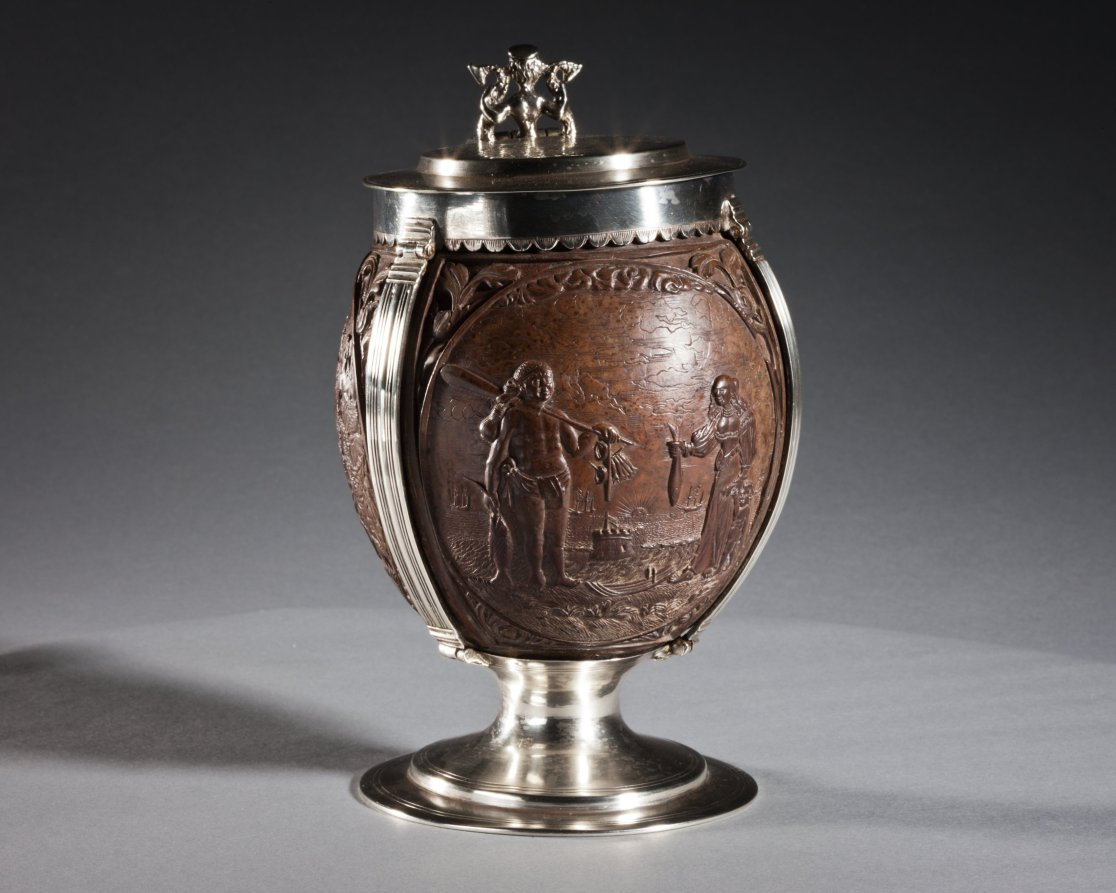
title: Coconut Cup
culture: carved coconut, probably The Netherlands; silver mount, probably England, 17th century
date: c. 1630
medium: carved coconut in silver mount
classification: Metalwork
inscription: top lid has engraved coat-of-arms, underside of lid has inscription: George Lewis TIVERTON Feby, 1st 1760.